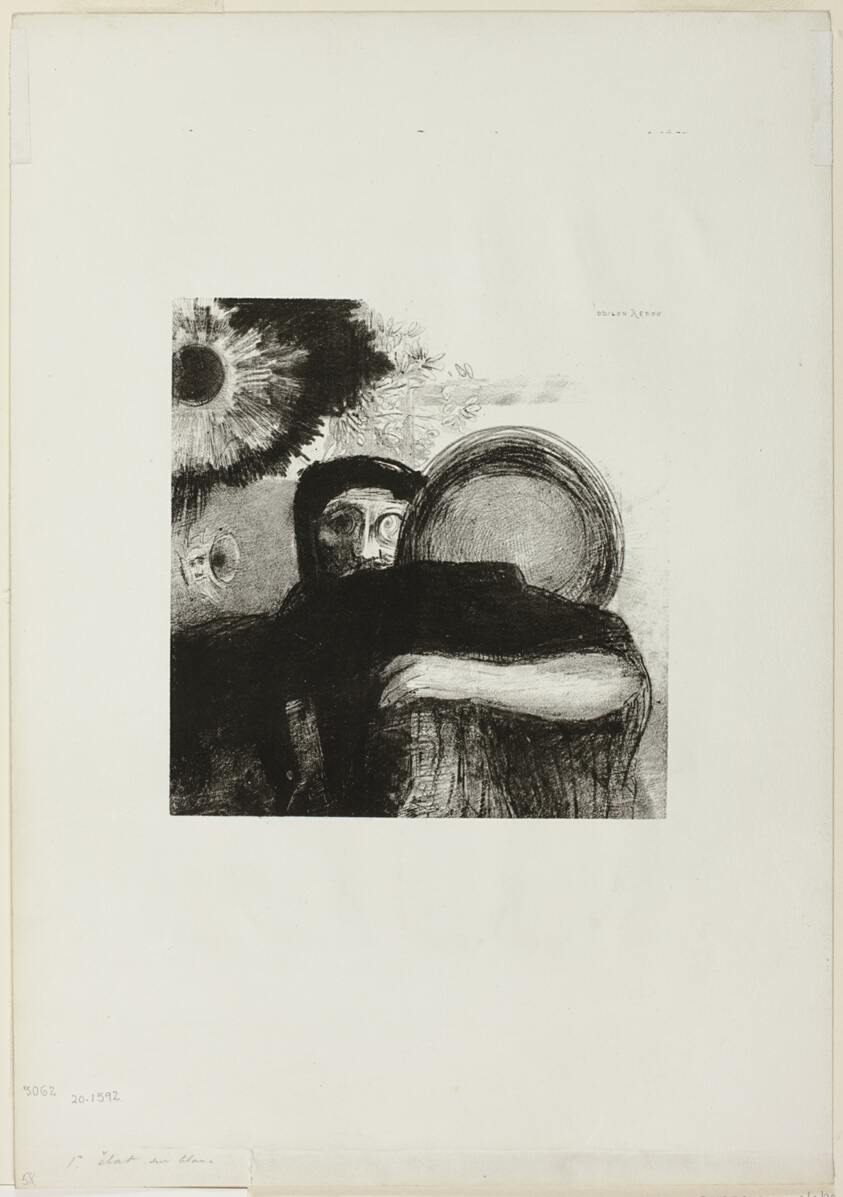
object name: Print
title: A Strange Juggler, plate 5 from Homage to Goya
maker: Odilon Redon (French, 1840-1916)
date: 1885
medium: Lithograph in black on ivory wove paper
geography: France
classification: lithograph; print; prints and drawing; paper